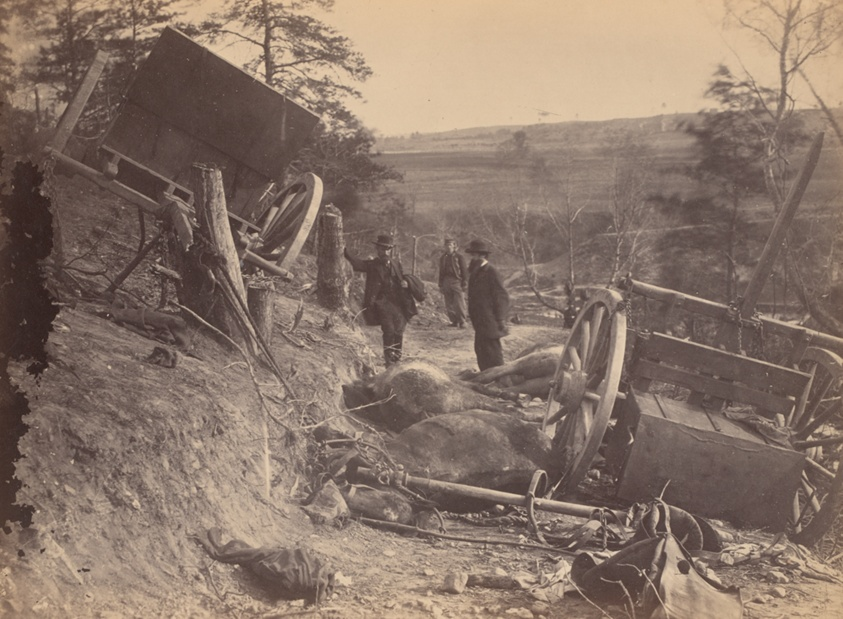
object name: Photograph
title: Scene of Battle, Fredericksburg, Virginia [Caissons Destroyed by Federal Shells]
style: 19th century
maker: Andrew J. Russell; American, 1830-1902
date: May 3, 1863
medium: Albumen print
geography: United States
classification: photography; albumen print from collodion negative; photograph; photographic process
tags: lundberg collection, battles, landscape, landscapes, people